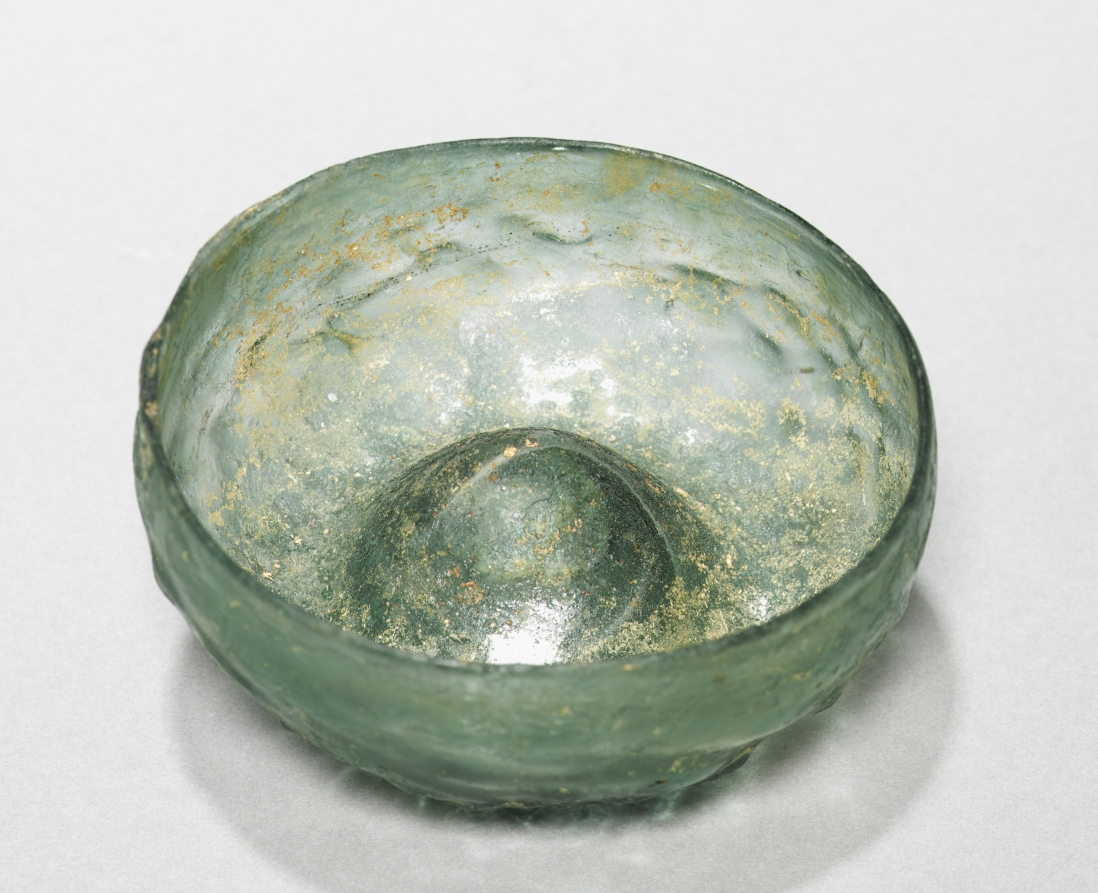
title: Bowl (Maigelein)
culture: Germany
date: 1400s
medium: green glass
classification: Glass